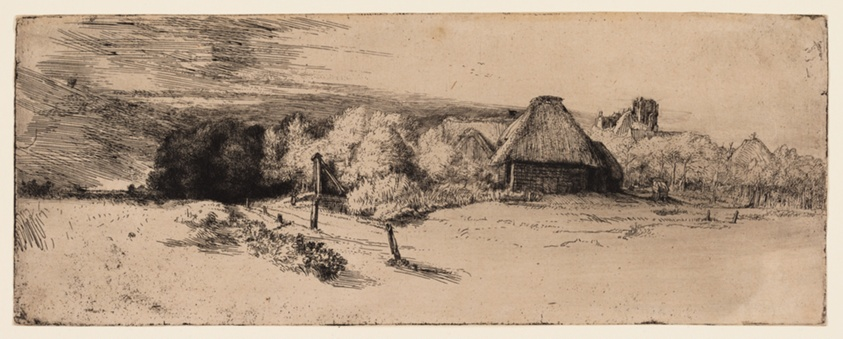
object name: Print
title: Landscape with a Farm Building and the "House with the Tower"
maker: Rembrandt van Rijn (Dutch, 1606-1669)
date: c. 1650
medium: Etching and drypoint on Japanese paper, laid down on cream laid paper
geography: Holland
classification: etching; print; prints and drawing; paper; drypoint